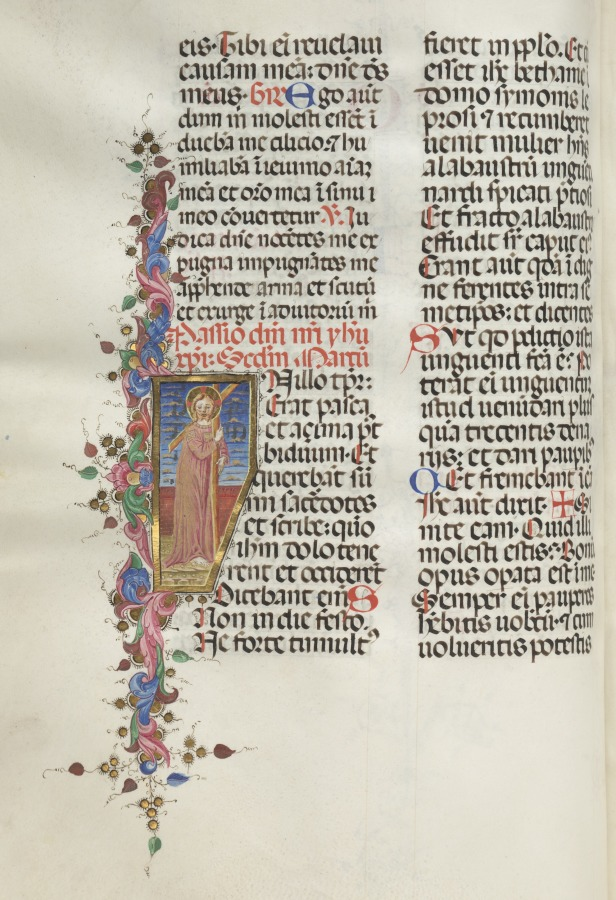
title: The Caporali Missal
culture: Italy, Perugia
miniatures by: Bartolommeo Caporali (Italian, c. 1420–1503)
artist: assisted by Giapeco Caporali (Italian, d. 1478)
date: 1469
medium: Ink, tempera and gold on vellum; 400 folios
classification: Bound Volume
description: Called a missal, this manuscript served as a liturgical service book used by the priest at the altar during Mass. According to a colophon, an inscription on folio 400, the missal was made for the Franciscan church of San Francesco in Montone, near Perugia in the region of Umbria, in 1469. It was illuminated by Bartolomeo and Giapeco Caporali, two artist brothers who collaborated on the page decorations. The missal is opened here to the volume’s masterpiece, a two-page deluxe opening to the Canon of the Mass with a Calvary scene. The Canon introduces the most solemn part of the Mass during which the priest elevates and consecrates the Eucharistic bread and wine. Saint Francis kneels at the foot of the cross, attesting to the missal’s Franciscan use and affiliation.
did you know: Bartolomeo Caporali and his brother Giapeco shared a house and a workshop in Perugia.